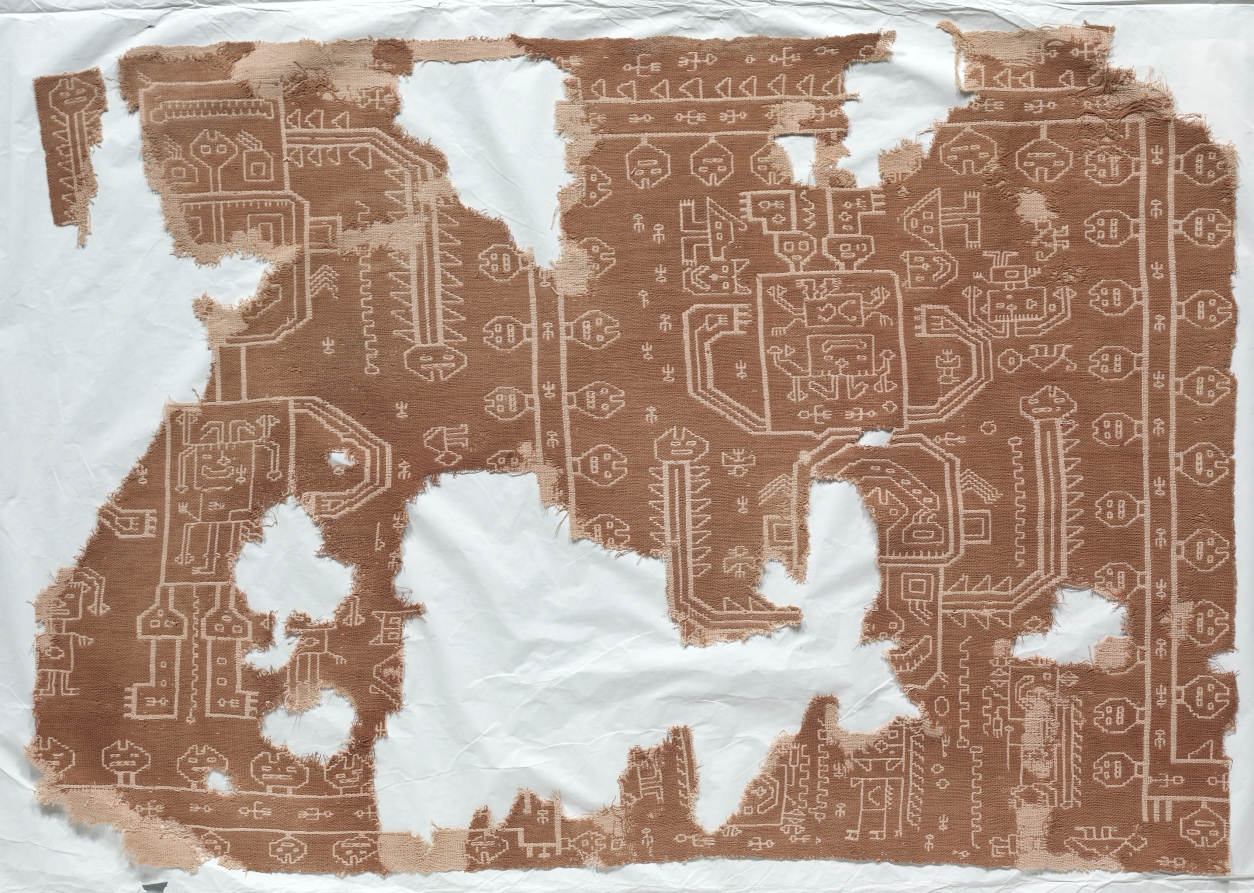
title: Fragment of a Mantle with Oculate Being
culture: Peru, South Coast, Paracas, Carhua?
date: 200–1 BCE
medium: cotton; double-cloth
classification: Textile